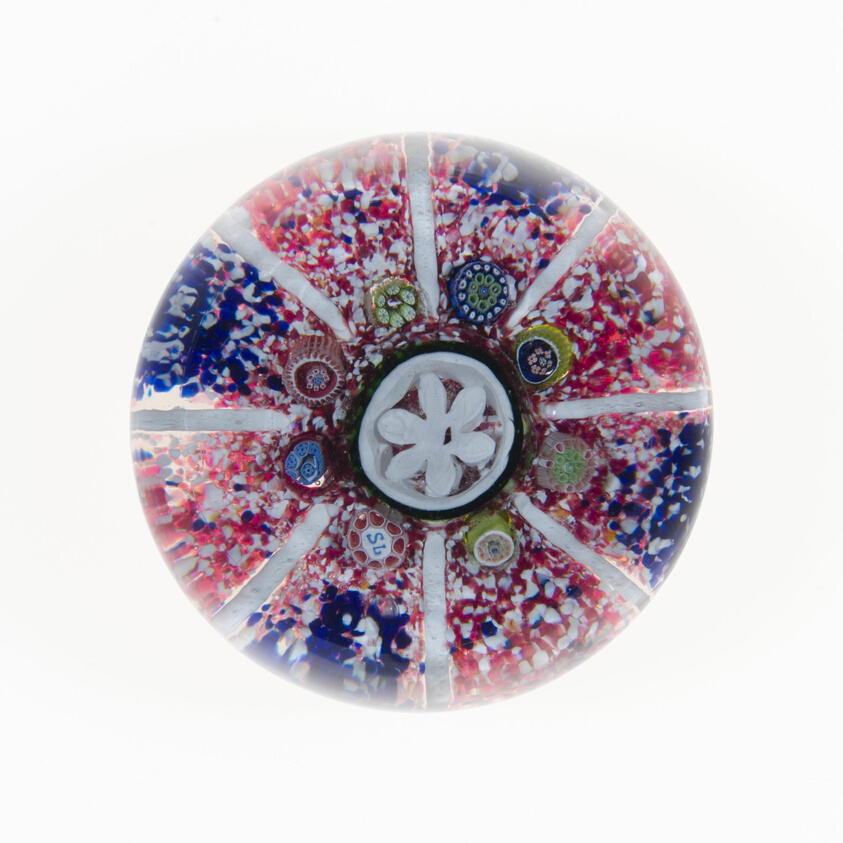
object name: Glass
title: Paperweight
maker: Saint-Louis Glassworks (Cristalleries de Saint-Louis); Lorraine, France, founded 1586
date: c. 1845/60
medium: Glass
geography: Saint-Louis-lès-Bitche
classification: paperweight; glass